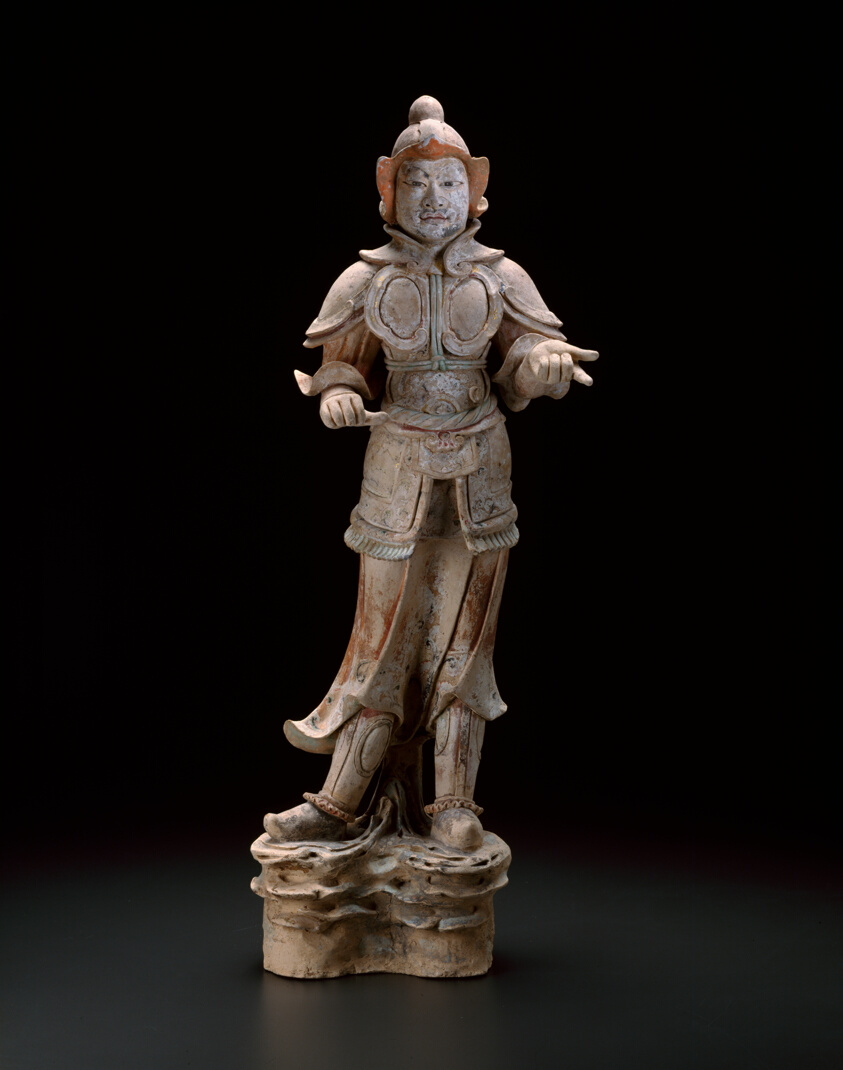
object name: Sculpture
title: Armored Guardian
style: Chinese (culture or style)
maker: China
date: Tang dynasty (618–907), late 7th or early 8th century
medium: Buff earthenware with polychrome and gilding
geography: China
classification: earthenware; asian art; ceramics; ritual objects